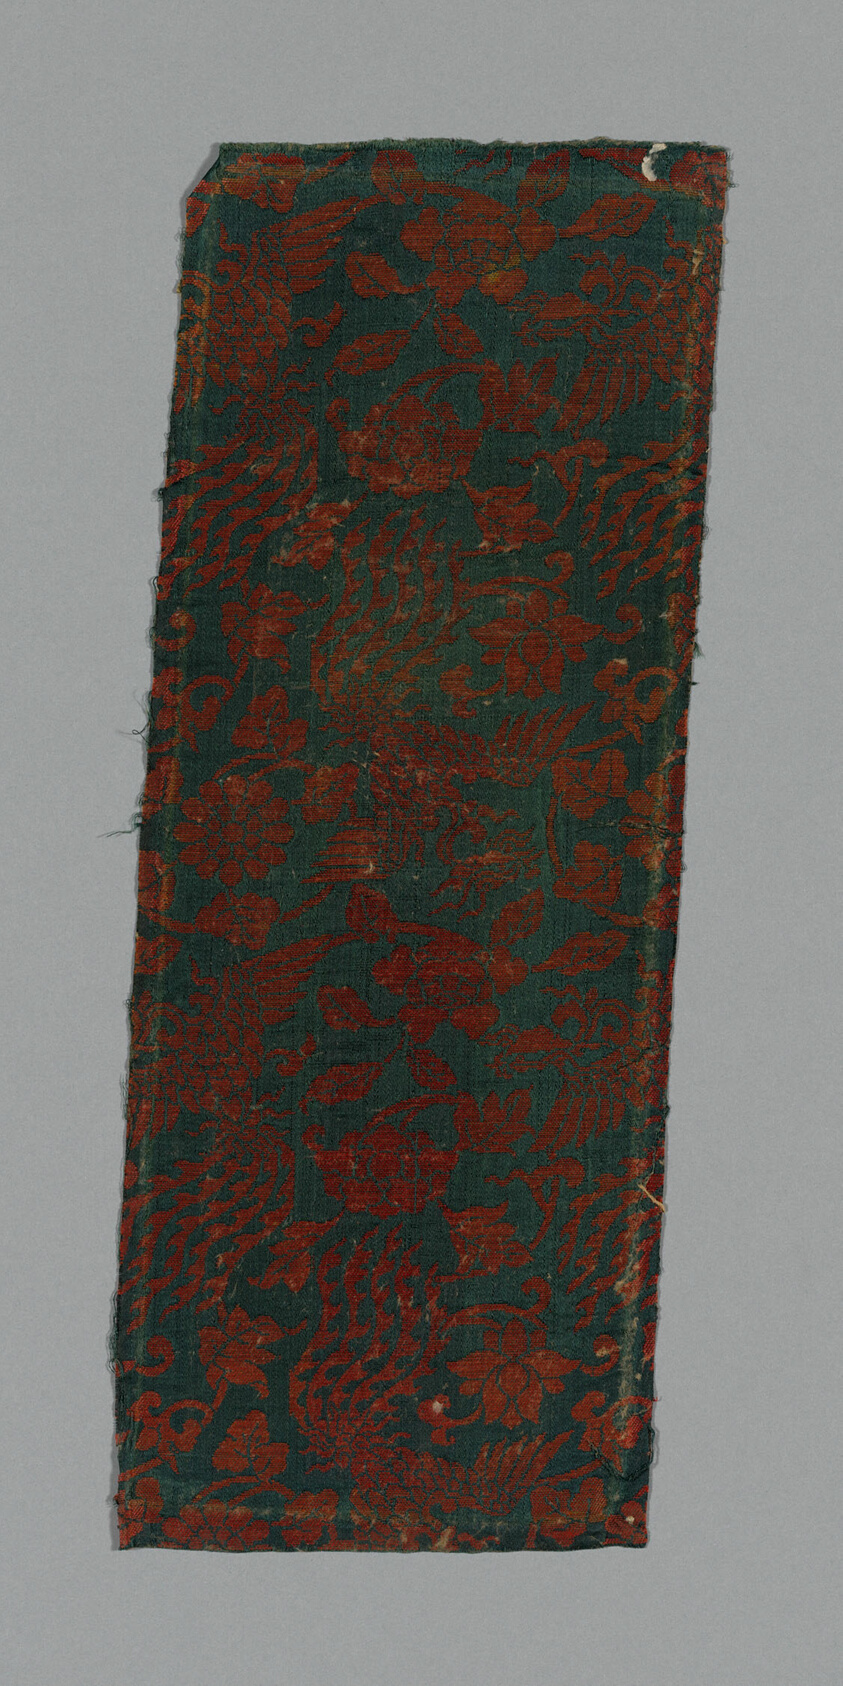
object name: Textile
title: Sutra Cover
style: ming, Chinese (culture or style), East Asian, asian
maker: China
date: Ming dynasty (1368–1644), c. 1590's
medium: Silk, warp-float faced 4:1 stain weave with supplementary patterning wefts bound in weft-float faced 1:4 satin interlacings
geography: China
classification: textile; weaving